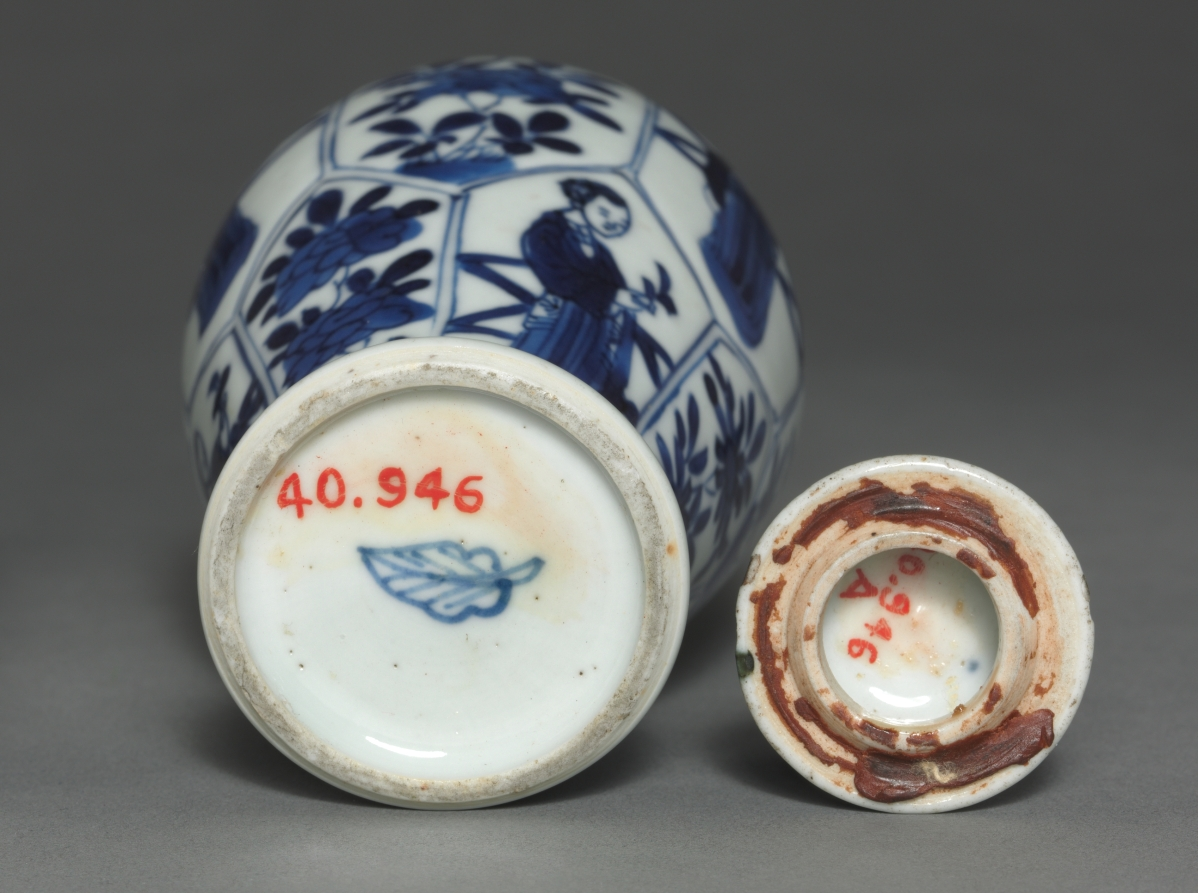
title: Jar with Cover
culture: China, Qing dynasty (1644-1911)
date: 19th Century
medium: porcelain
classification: Ceramic